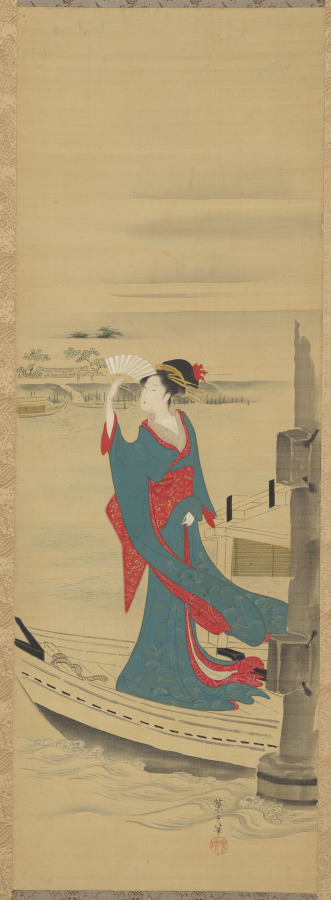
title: Beauty in a Boat on Sumida River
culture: Japan, Edo period (1615–1868)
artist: Chōbunsai Eishi (Japanese, 1756–1829)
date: c. 1801–4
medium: hanging scroll; ink and color on silk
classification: Painting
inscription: artist's signature 栄之筆 and seal, lower right.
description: The Sumida River was a popular refuge from the heat and humidity of the city during the summer. One can see the torii gate of Mimeguri Shrine just to the left of the woman's fan.